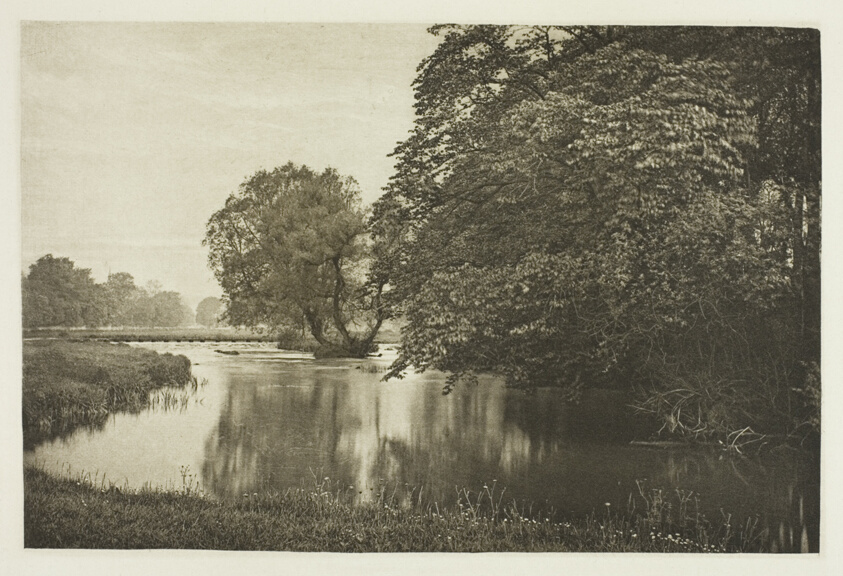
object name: Photograph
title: Crow-Island Stream, River Wye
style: 19th century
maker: Peter Henry Emerson (English, born Cuba, 1856–1936)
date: 1880s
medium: Photogravure, plate XXXII from the album "The Compleat Angler or the Contemplative Man's Recreation, Volume II" (1888)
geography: England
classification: photogravure; photomechanical process; photography; photograph